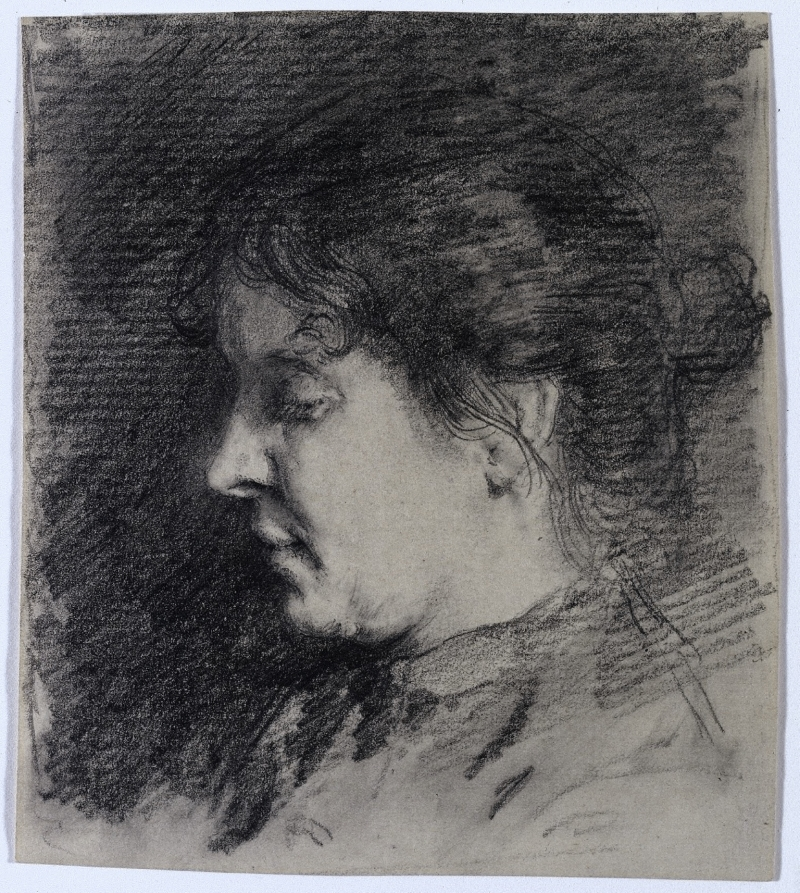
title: Sarah H. Crone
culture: America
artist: Samuel H. Crone (American, 1858–1913)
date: 1880s or 1890s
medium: graphite and black chalk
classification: Drawing